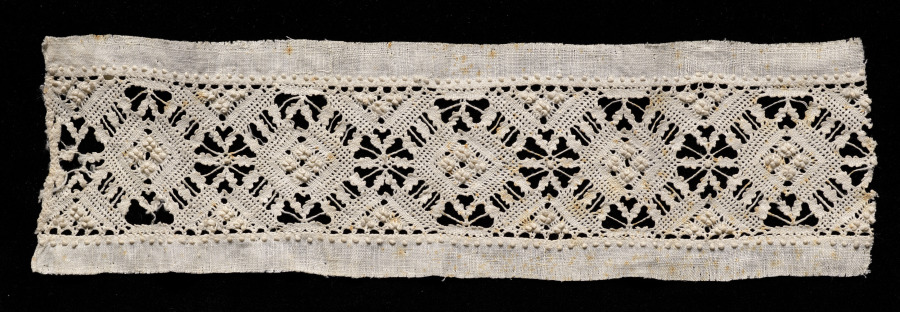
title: Lace Insertion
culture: Italy, Venice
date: 1540–60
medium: Bobbin lace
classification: Lace